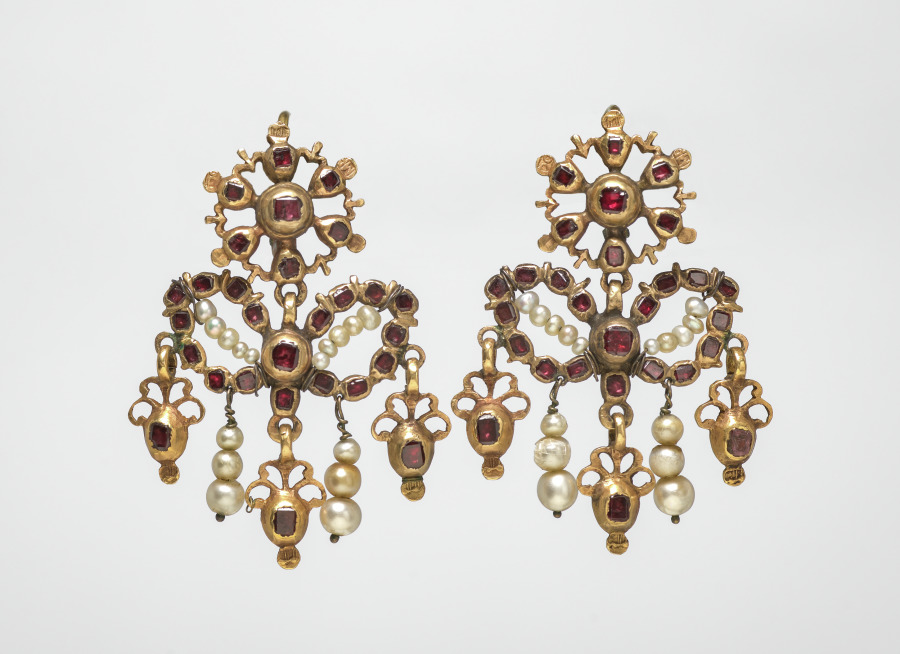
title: Woman's Costume (Earring)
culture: Italy, 19th century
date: 1800s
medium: gold and jewels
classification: Jewelry